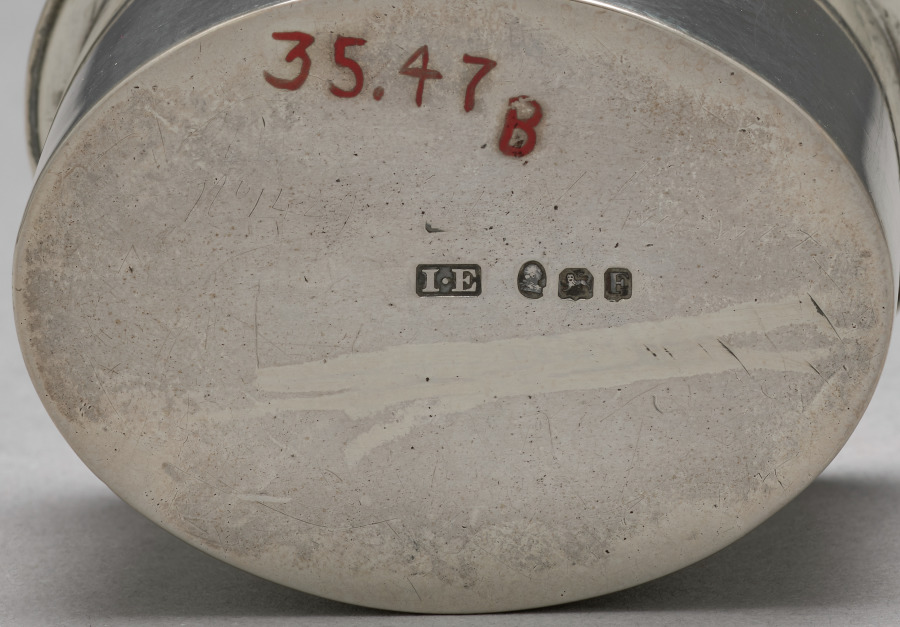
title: Cover for a Hot Water Jug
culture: England, early 19th century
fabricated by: John (British) Edwards (British)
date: 1800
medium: silver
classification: Silver